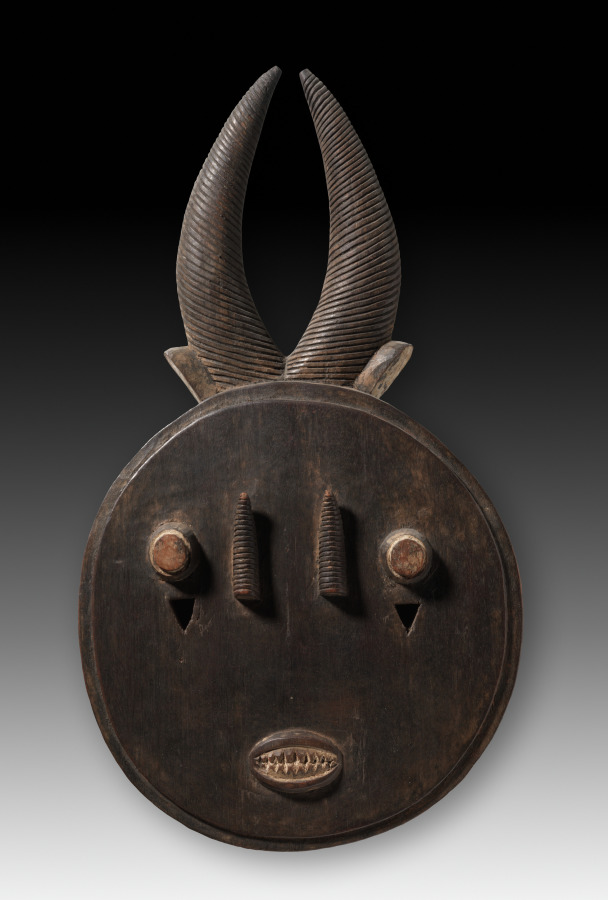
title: Mask (Kple Kple or Kouassi Gbe)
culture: Africa, West Africa, Côte d’Ivoire, Baule-style carver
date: late 1800s-early 1900s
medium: Wood, resin, and paint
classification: Mask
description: This kple kple mask belongs to the first of four pairs of masks that entertain as part of a performance sequence in the goli dance. The male in each pair dances first. The masks are worn by young boys in a rapid stamping dance. The masqueraders alternate with each other and watch their partners perform. The head of the male kple kple is painted red, whereas the female, like this example, is colored black.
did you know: The wearer of this mask would secure it on his face by biting onto a (now-missing) piece of rope attached to the back.